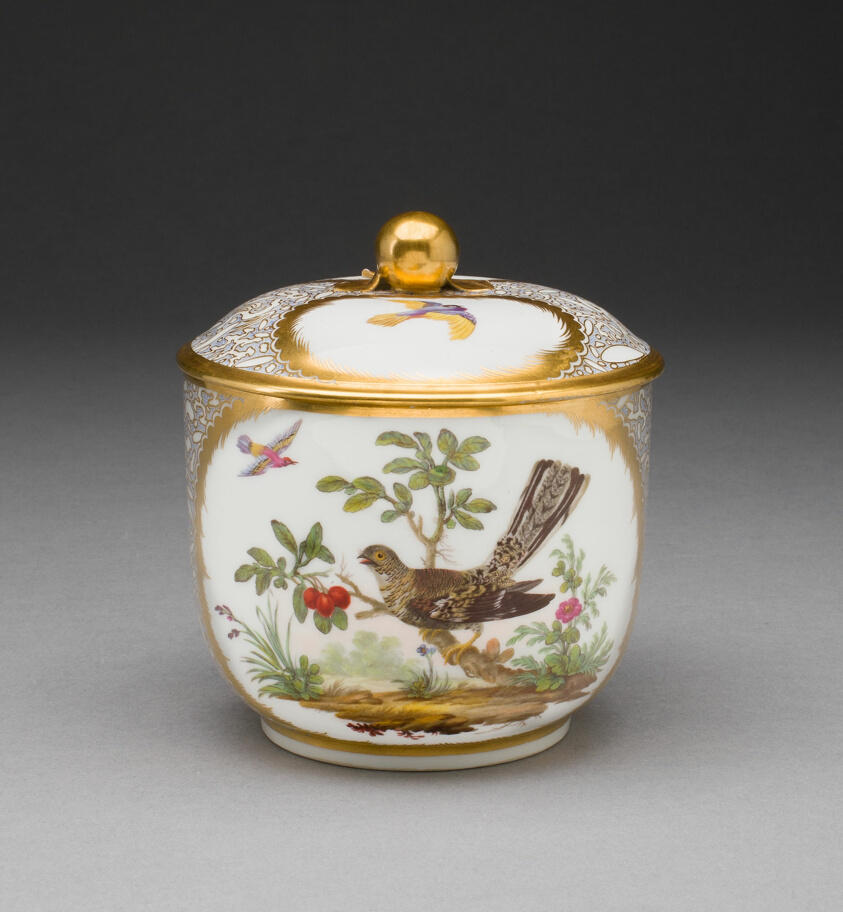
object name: Ceramics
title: Sugar Bowl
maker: Sèvres Porcelain Manufactory; French, founded 1740; Painted by Philippe Castel (attributed to); French, 1772-1796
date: 1781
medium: Hard-paste porcelain, polychrome enamels, gilding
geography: Sèvres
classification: sugar bowl; porcelain; teaware; ceramics; european decorative arts